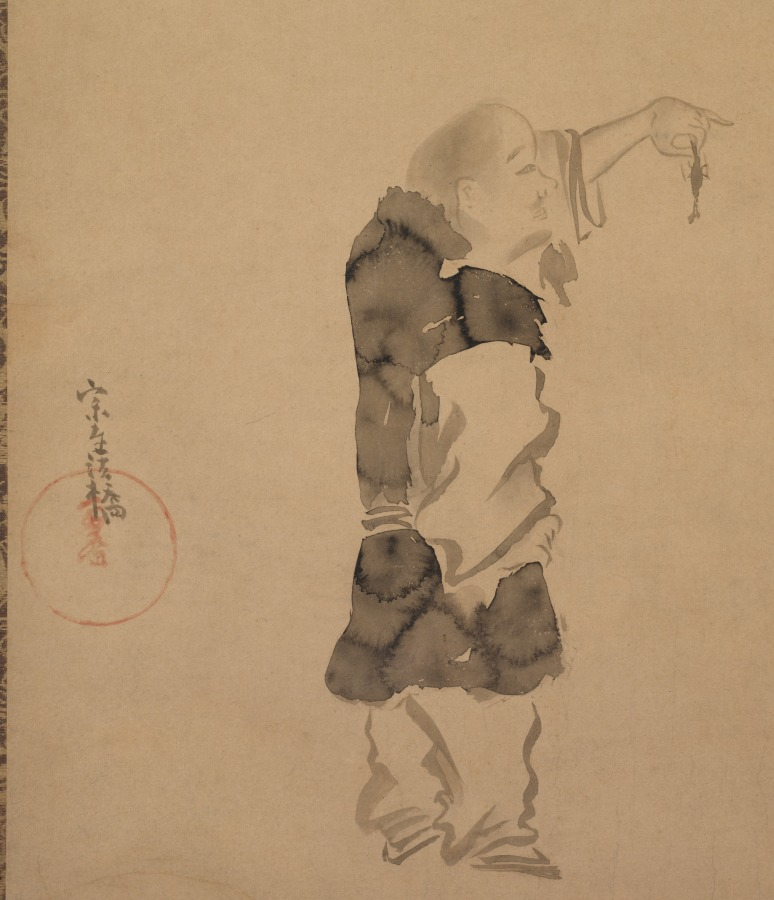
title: Kenshu, Monk with Shrimp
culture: Japan, Edo period (1615–1868)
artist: studio of Tawaraya Sōtatsu (Japanese, c. 1570–c. 1640)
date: c. 1600–1640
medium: hanging scroll; ink on paper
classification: Painting